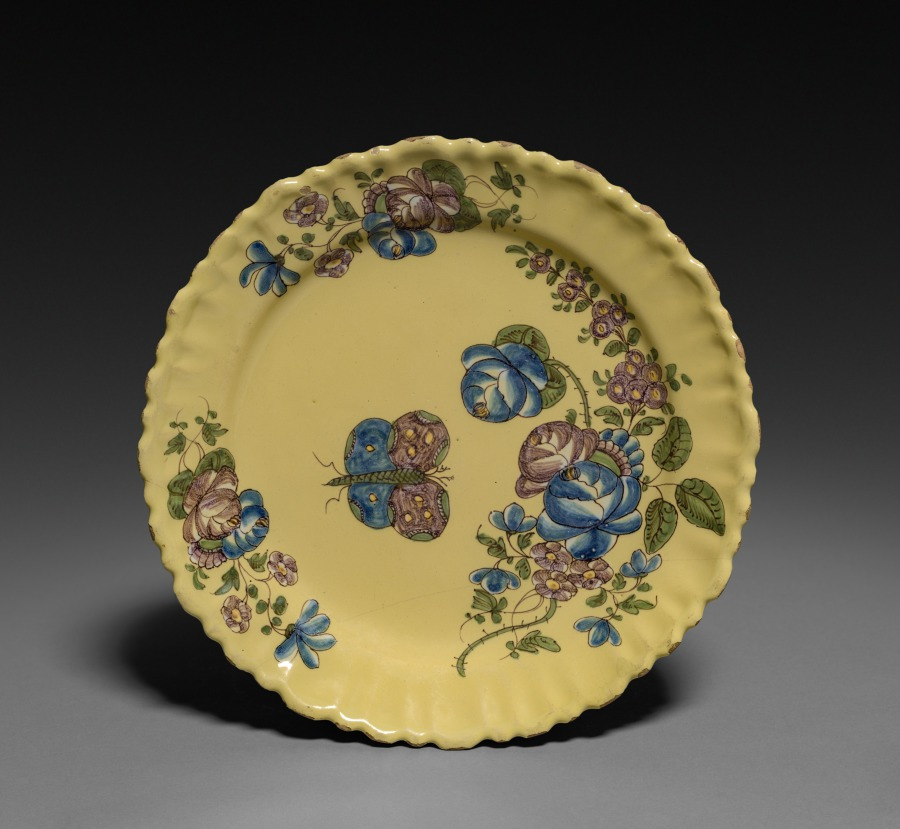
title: Plate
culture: France, 18th century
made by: Samadet Factory (French)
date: c. 1760–1765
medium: faience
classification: Ceramic